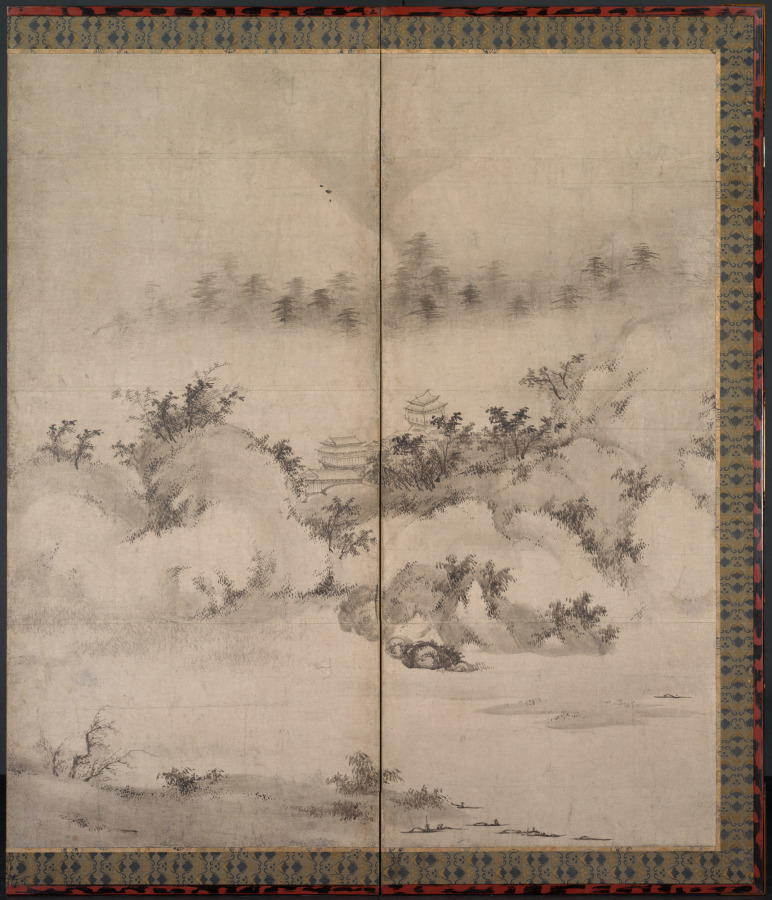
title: Landscape with Motifs from the Eight Views of Xiao-Xiang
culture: Japan, Momoyama period (1573–1615)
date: late 1500s–early 1600s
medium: One of a pair of six-panel folding screens; ink on paper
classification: Painting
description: This screen is from a separated pair depicting the Eight Views of Xiao-Xiang, a Chinese painting and poetry theme. Read in the manner customary for Japan, from right to left, the motifs here are “Evening Bell from a Mist-Shrouded Temple,” “Wild Geese Descending to a Sandbar,” “Sunset Glow over a Fishing Village,” and “Mountain Market in Clearing Mist.” The “crab-claw” style of the trees, in which the branches resemble the curved claws of a crab, and the stippling effect indicate a familiarity with Korean interpretations of Chinese painting styles of the Song dynasty..